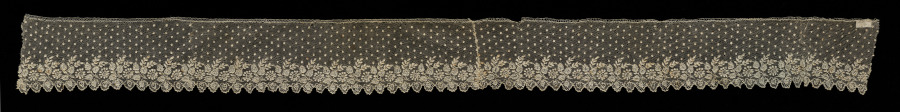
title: Lace Edging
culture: France, Alençon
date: 1700s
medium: Linen: needle lace (Point d'Alençon)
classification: Lace